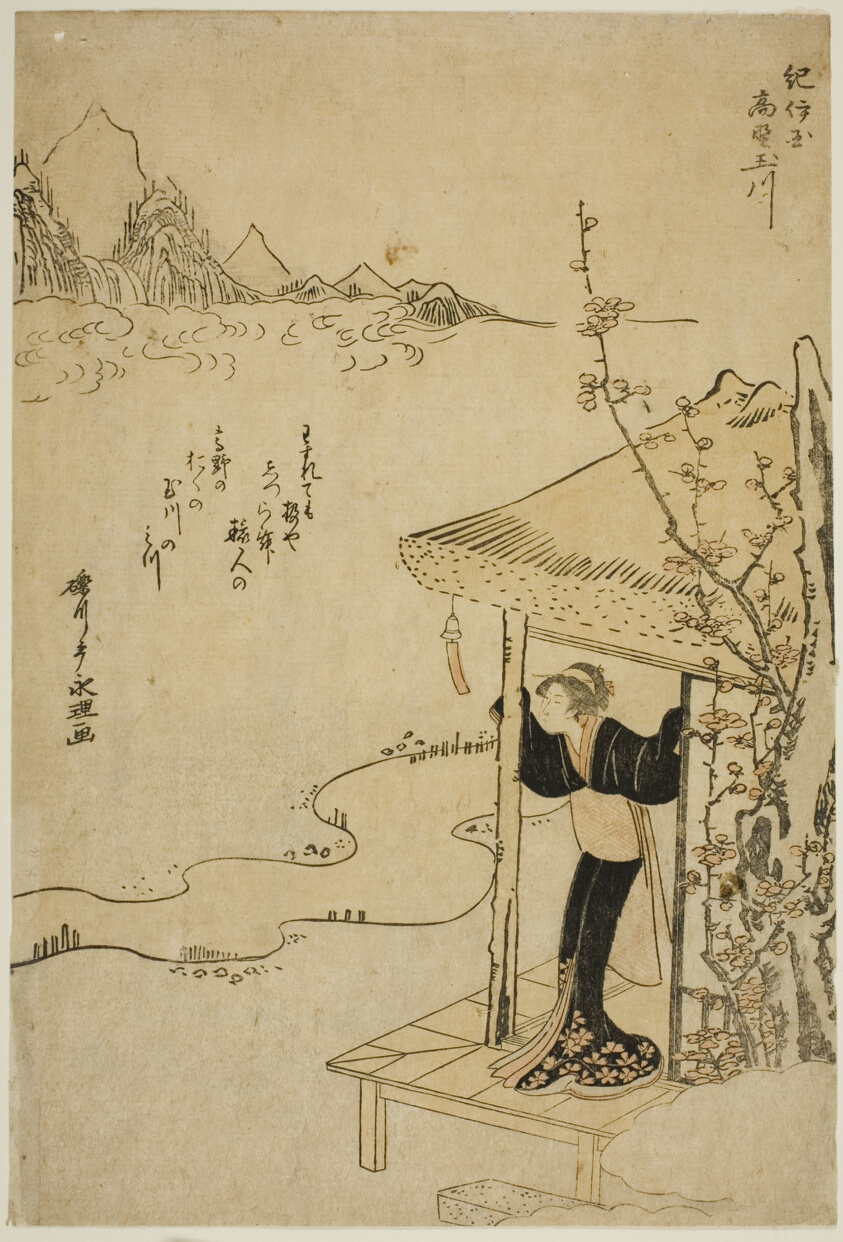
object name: Print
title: The Koya Jewel River in Kii Province (Kii Koya no Tamagawa), from an untitled series of Six Jewel Rivers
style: Japanese (culture or style)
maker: Rekisentei Eiri (Japanese, active c. 1781–1818)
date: c. 1785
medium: Color woodblock print; aiban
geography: Japan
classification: woodblock print; print; asian art